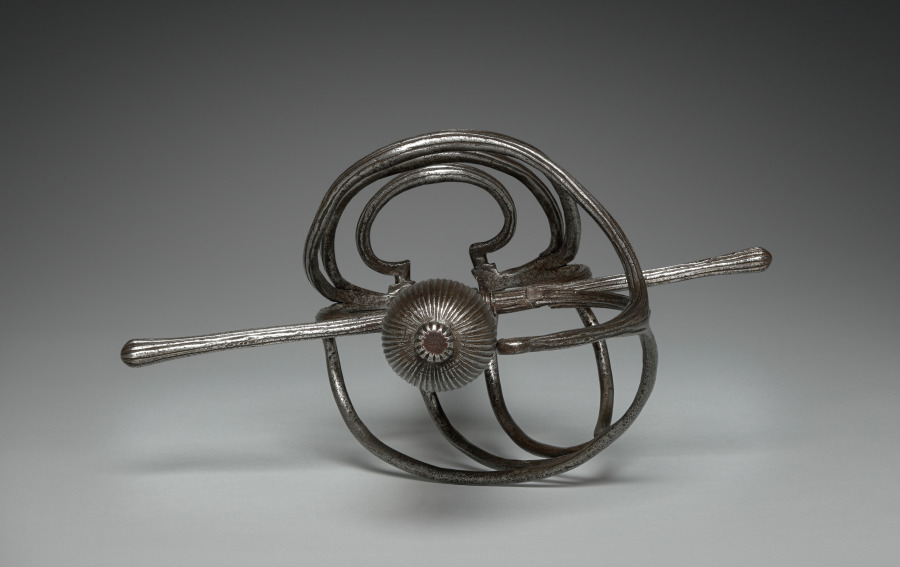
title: Rapier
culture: Blade: Spain, Toledo Hilt: Italt, Belluno?, late 16th-early 17th Century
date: c. 1580–1610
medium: steel, ribbed guard and pommel; wood and wire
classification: Arms and Armor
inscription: PIETRO HERNAN[DJEZ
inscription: three (Toledo and half-moon)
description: The rapier was a sword worn with civilian dress and used in duels. The term rapier derives from the 16th-century French word rapière, which in turn derived from the Spanish espada ropera, or “dress sword.” The rapier was a light weapon with a straight double-edged and pointed blade that, with the development of the art of fencing in the 1500s and 1600s, gradually became narrower and lighter, and thus suitable for thrusts only. With the new technique of swordplay emphasizing the point of the blade, sword guards became more complex to protect the duelist’s unarmored hand. These elaborate guards were frequently decorated by various techniques—chiseling, bluing, russeting, and damascening.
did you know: During this time fencing academies were already in existence in Milan, Venice, Verona, and Madrid, and the rules of fencing evolved with two styles dominating, the Spanish and the Italian.